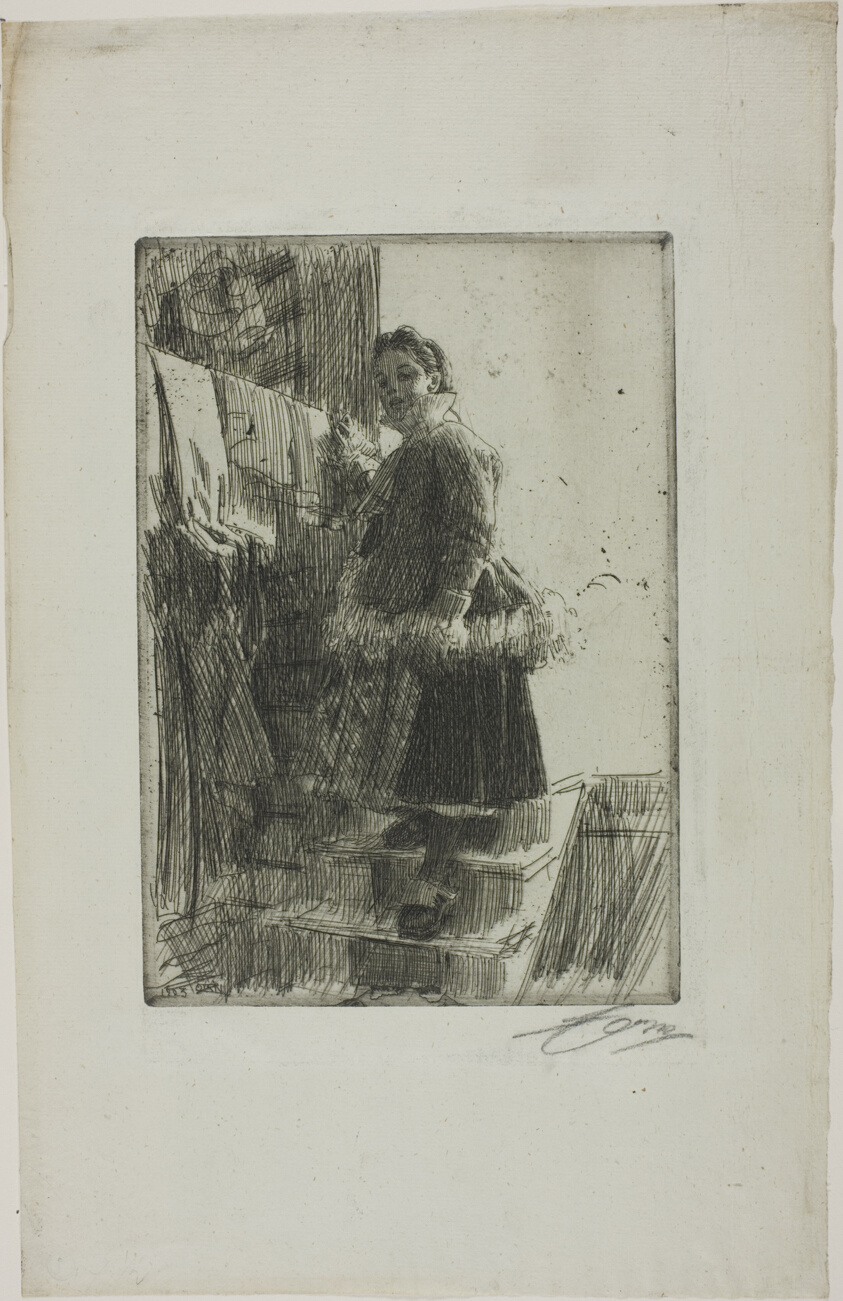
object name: Print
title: The Storehouse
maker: Anders Zorn (Swedish, 1860-1920)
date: 1903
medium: Etching on off-white laid paper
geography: Sweden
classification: etching; print; prints and drawing